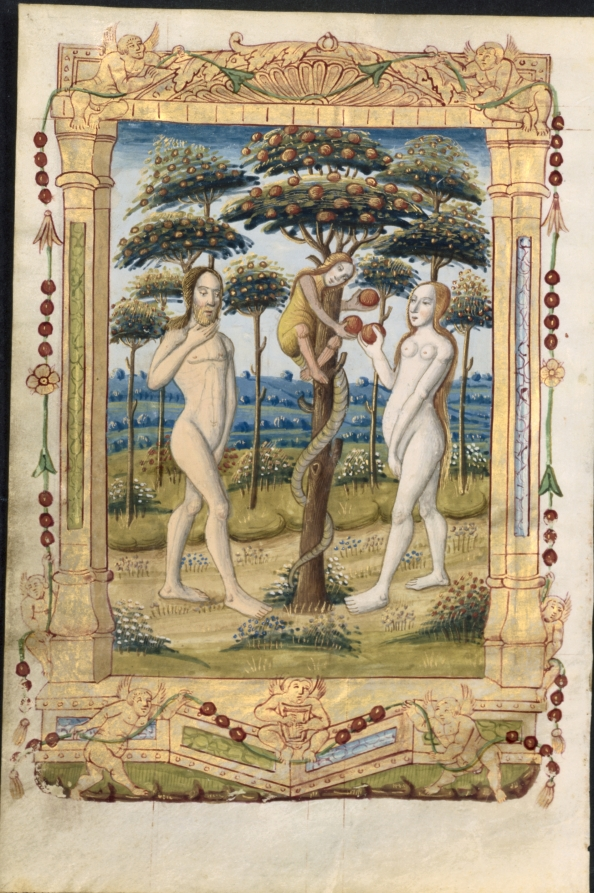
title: Leaf from a Book of Hours: Adam and Eve and the Fall of Man (Prefatory Miniature to the Office of the Virgin) (recto)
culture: France, Rouen, 16th century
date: c. 1510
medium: ink, tempera and liquid gold on vellum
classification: Manuscript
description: Characteristic of the artist's hand, the bright orange-reds combine with deep blues, greens, and an abundance of gold wash in this leaf. He used fine parallel lines or crosshatching in gold to indicate the shading, highlights, and texture of draperies, suggesting some knowledge of printmaking, an art for which Rouen was also an important center. His figures have large, thickly outlined oval faces. This miniature also demonstrates the emerging fashion in both Rouen and Paris for highly involved, Italianate architectural frames: winged putti, swags, urns, garlands, scallop shells, pillasters, and masks. These elements could be assembled in different ways so that no two frames were identical. Rouen in the late 1400s and early 1500s was an established and important center for book production. Richly decorated library texts and books of hours, such as the present leaves, were made in Rouen for sale in the cours des libraires, next to the cathedral.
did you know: This leaf came from a highly customized and lavish book of hours made in Rouen, a major center of book production at the time.